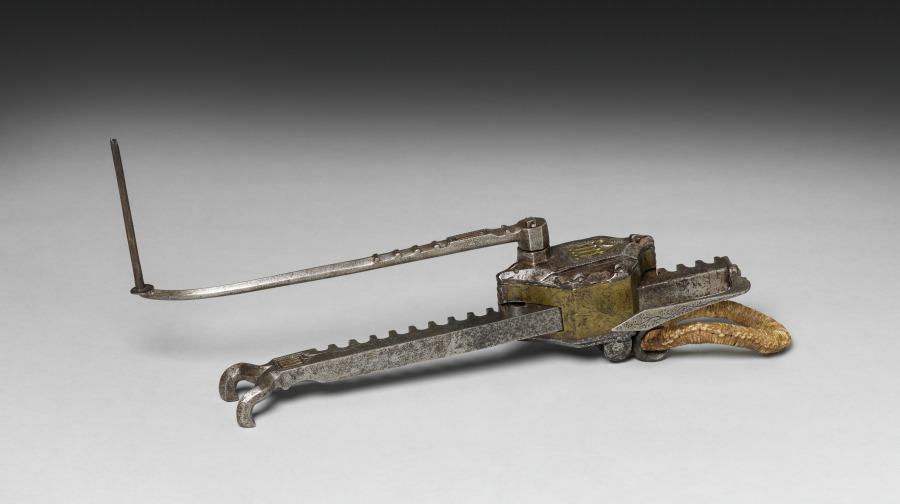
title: Cranequin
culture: France(?)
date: c. 1480–1500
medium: steel and brass; incised decoration; pierced traceried Gothic windows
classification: Arms and Armor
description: Bows made of composite materials were developed during the 1400s. They were immensely powerful and could be spanned only with the aid of a winder called a cranequin like the one seen here.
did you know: The mark, made of inlaid copper, is currently unidentified.